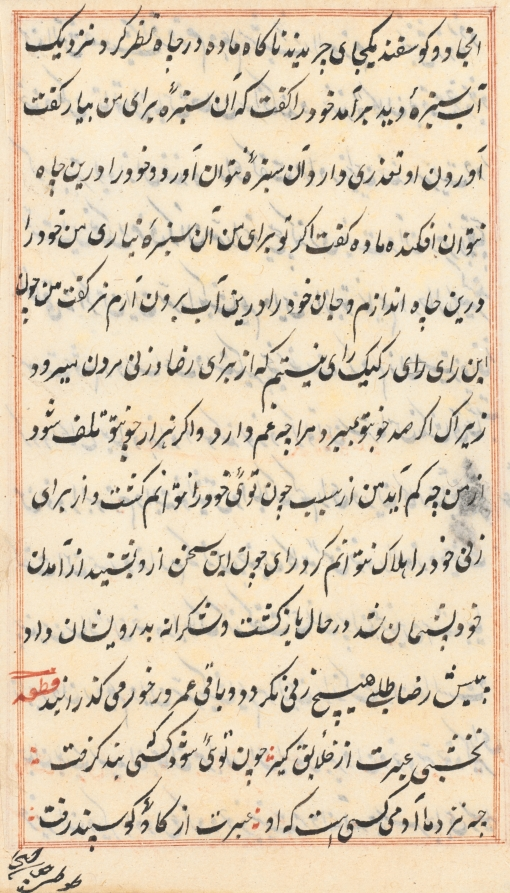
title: Page from Tales of a Parrot (Tuti-nama): text page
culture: Mughal India, court of Akbar (reigned 1556–1605)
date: c. 1560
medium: gum tempera, ink, and gold on paper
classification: Painting